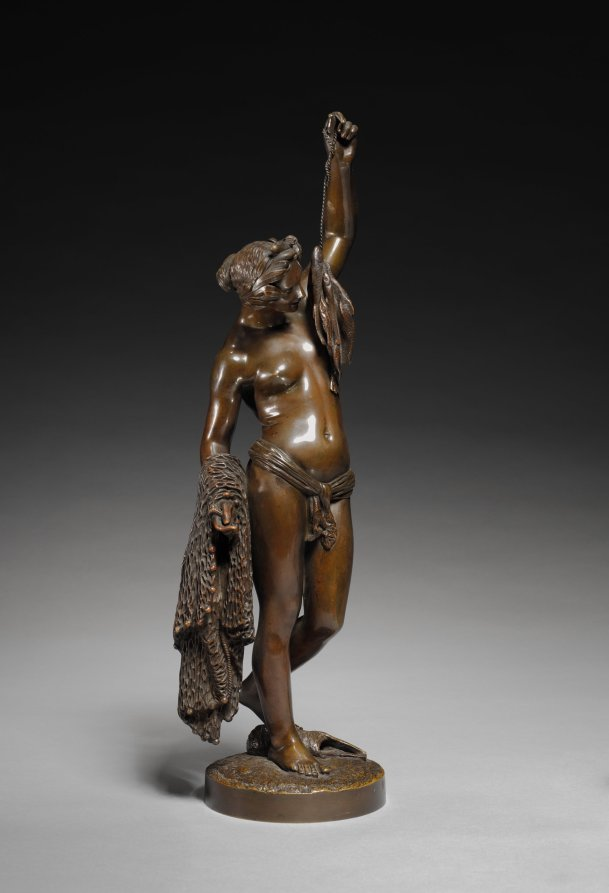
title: Allegory of Fishing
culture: France, 19th century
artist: James Pradier (Swiss, 1790–1852)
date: c. 1840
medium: bronze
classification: Sculpture